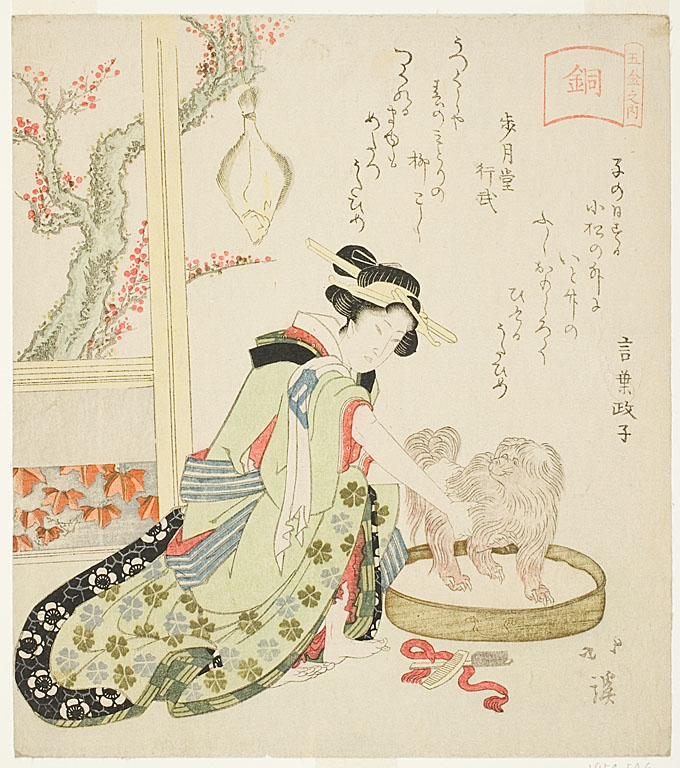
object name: Print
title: Bronze (Do), Woman Grooming Pekingese Dog, from the series "The Five Metals (Gokin no uchi)"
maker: Totoya Hokkei (Japanese, 1780-1850)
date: early 19th century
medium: Color woodblock print; surimono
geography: Japan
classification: woodblock print; print; asian art